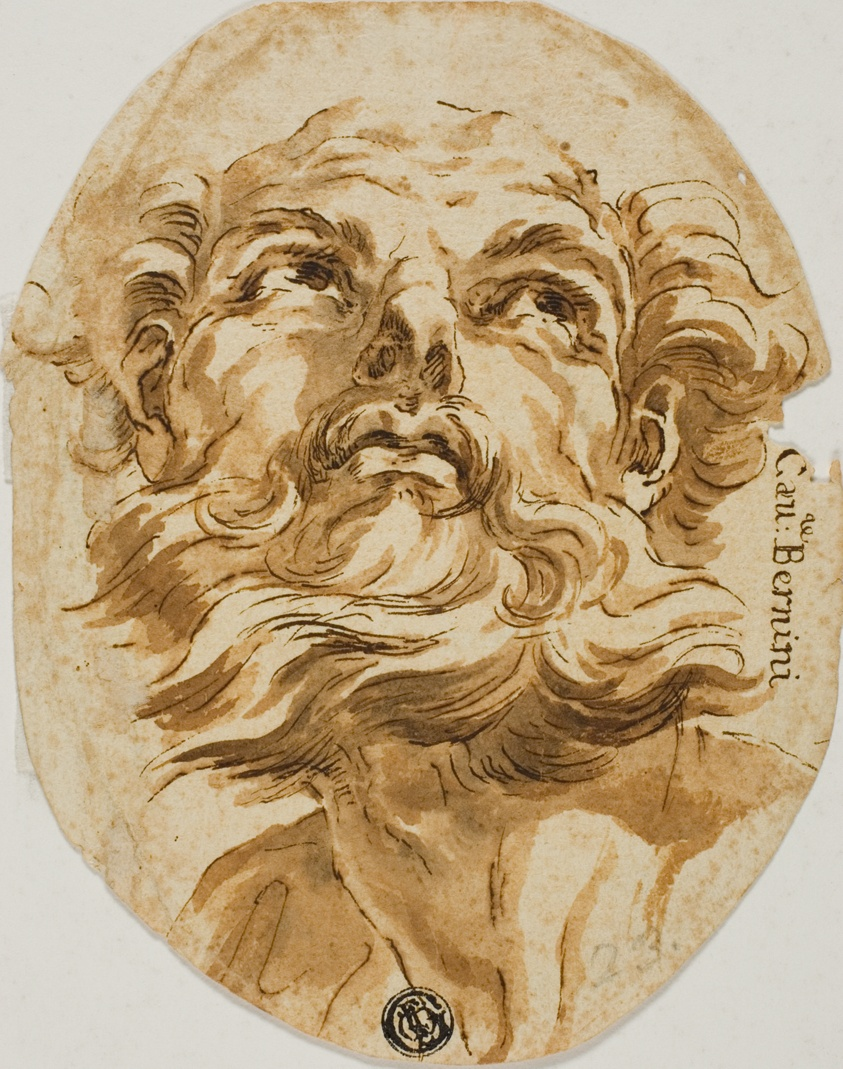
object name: Drawing and Watercolor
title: Bearded Head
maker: Attributed to the circle of Domenichino (Italian, 1581-1641); or Gian Lorenzo Bernini (Italian, 1598-1680) or a follower; or the circle of Giovanni Lanfranco (Italian, 1582-1647); or the circle of Giovanni Battista Gaulli (Italian, 1639-1709)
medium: Pen and brown ink with brush and brown wash on ivory laid paper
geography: Italy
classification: ink or chalk wash; drawings (visual works); prints and drawing